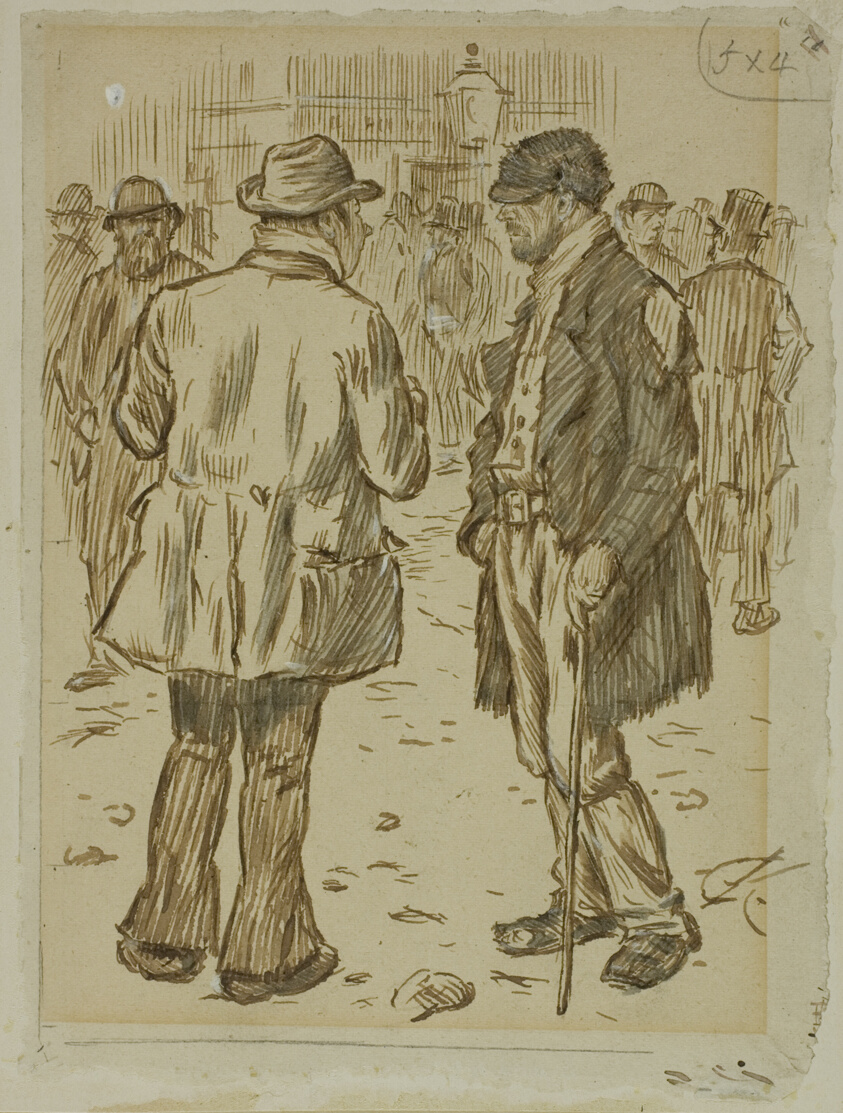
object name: Drawing and Watercolor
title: Employment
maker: Charles Samuel Keene (British, 1823-1891)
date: 1870/91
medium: Pen and brown ink,with brush and gray wash and touches of white gouache, on tan wove paper, laid down on ivory wove card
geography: England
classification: pen and ink drawings; drawings (visual works); prints and drawing